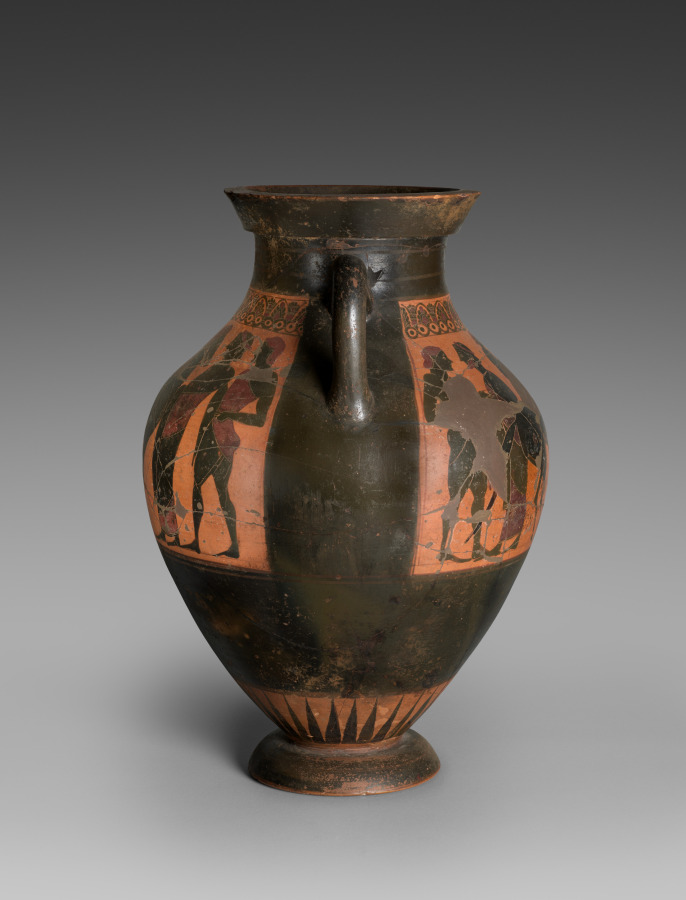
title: Black-Figure Amphora (Type B; Storage Vessel): Men and Horses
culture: Greek, Attic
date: c. 540 BCE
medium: ceramic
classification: Ceramic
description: Although pieced together from many fragments (with some still missing), this sizeable amphora remains impressive. On each side, a horsemen and four figures are contained within a large, reserved panel beneath a lotus-palmette frieze. The scenes, which differ slightly from one another in various details, cannot be identified with known historical or mythological figures or episodes.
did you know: The two sides of this amphora are very similar—a horseman flanked by pairs.